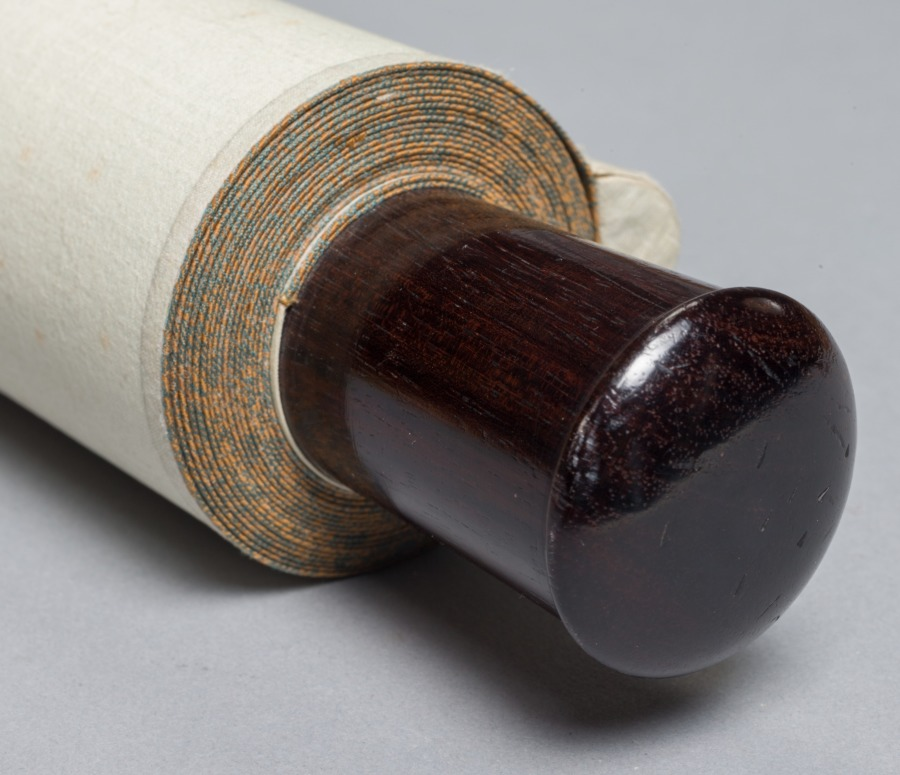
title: Banana Plant and Chrysanthemum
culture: Japan, Edo period (1615–1868)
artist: Tsubaki Chinzan (Japanese, 1801–1854)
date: c. 1820–54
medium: hanging scroll; ink and color on paper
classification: Painting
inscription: artist's inscription and two seals middle right side.